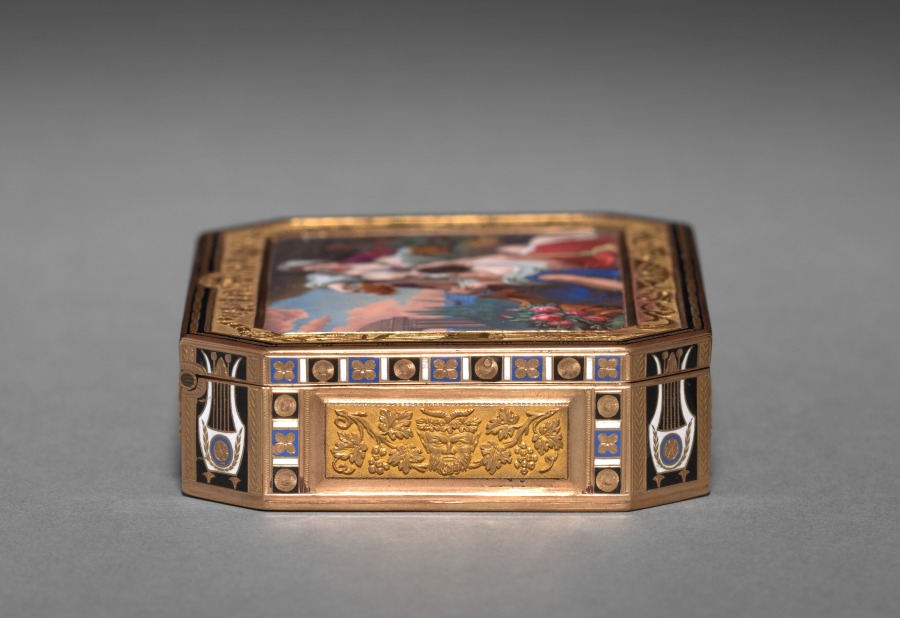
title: Box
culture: Switzerland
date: early 1800s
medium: gold and enamel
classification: Enamel